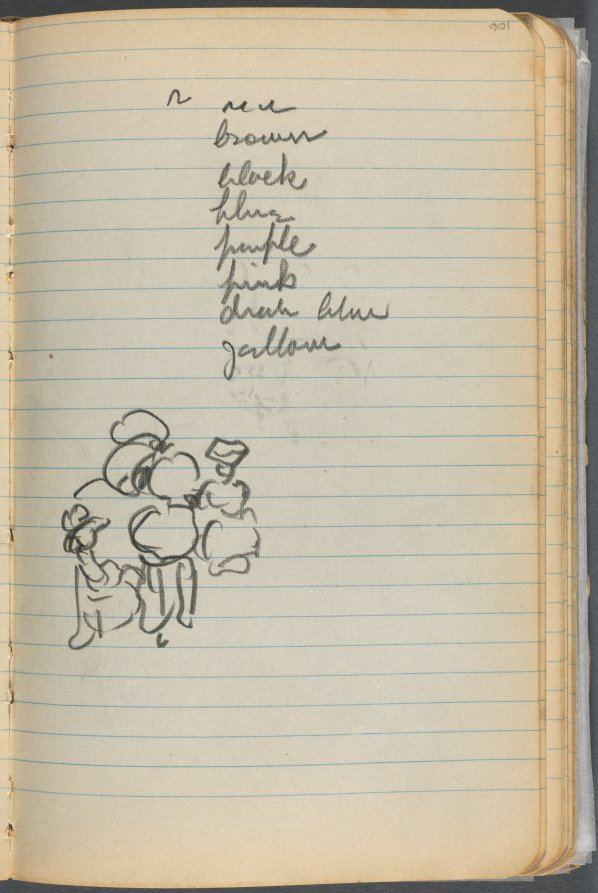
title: Sketchbook, page 106: Figures with color notaions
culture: America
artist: Maurice Prendergast (American, born Newfoundland [now Canada], 1858–1924)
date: 1907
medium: graphite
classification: Bound Volume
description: This sketchbook contains 69 pages of drawings, a diary largely devoted to the state of the artist's health, and a three-page discourse on the nature of genius and ideas.